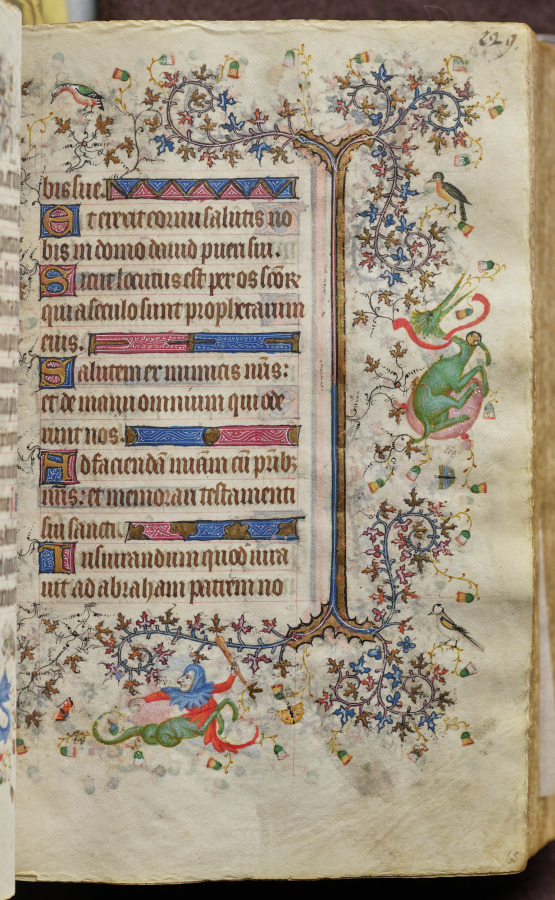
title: Hours of Charles the Noble, King of Navarre (1361-1425): fol. 65r, Text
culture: France, Paris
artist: Master of the Brussels Initials and Associates (French)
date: c. 1405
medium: ink, tempera, and gold on vellum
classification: Bound Volume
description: This precious volume was obviously highly prized by its owner, the French-born King of Navarre, who had his coat of arms painted on no less than twenty folios. Rather than directly commissioning this manuscript from a specific workshop, it seems that Charles the Noble acquired his book of hours -- perhaps ready-made for the luxury market -- while on a trip to Paris in 1404-05. A collaborative effort, six painting styles are evidenced within the pages of this codex, those of two Italians, two Frenchmen, and two Netherlanders. The painter who was responsible for the planning and decoration of the book, and who produced seventeen of the large miniatures, was a Bolognese artist known as the Master of the Brussels Initials. His principal assistant, responsible for most of the borders, was a Florentine who signed his name "Zecho" da Firenze on folio 208 verso.